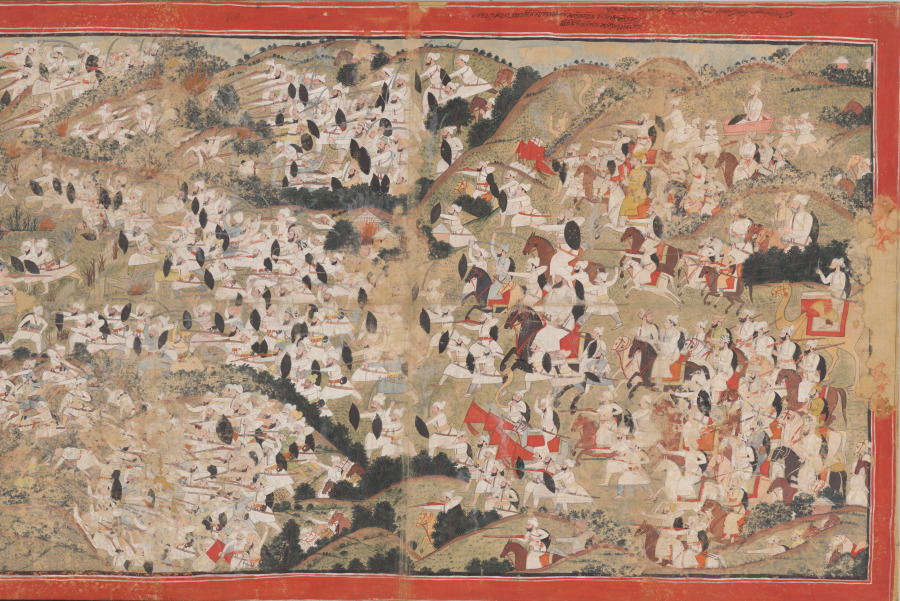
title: Raja Sansar Chand attacking Kangra Fort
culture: Northern India, Pahari kingdom of Kangra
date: after 1782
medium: Gum tempera, ink, and gold on cotton cloth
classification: Painting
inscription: Inscriptions in Takri and Persian. Persian reads: “On the 23rd of the month of Kartik, Samvat 1839 (1782 AD) Sri Maharaja Sansar Chand Bahadur attached Lakkarkot (Nagrakot ?) and the fortress of Kangra, attained victory and made siege intrenchments at the fortress of Kot Kangra.”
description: In 1782, the 17-year-old king of Kangra fought to retake his ancestral kingdom from the Mughals, who had controlled the territory since 1620. He rides a dark brown horse in front of the camel at the far right, blending in among his army and allies. The leftmost panel shows the residents of Kangra fleeing the conflict with their belongings on their heads to the safety of the fortress at the far left, from the walls where cannons are being fired. The main temple, built of gray stone, is in the middle of the composition, marked by red flags.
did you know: The king is 17 years old, beardless, riding a dark brown steed in front of the camel at the far right.